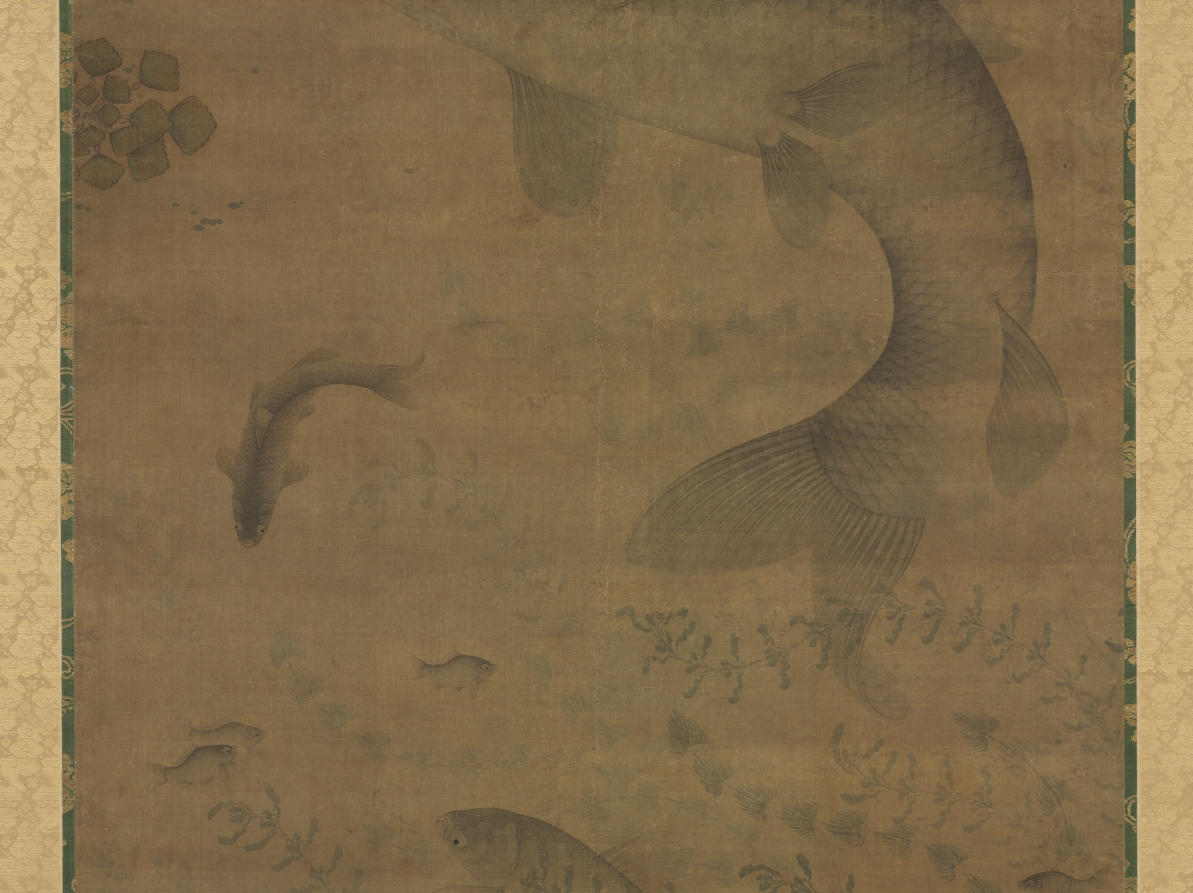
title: Leaping Carp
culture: China, Ming dynasty (1368–1644)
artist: Liu Jie (Chinese, c. 1447–1520s)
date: 1368–1644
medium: hanging scroll, ink and color on silk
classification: Painting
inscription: Artist's signature and seal: Written by Liu Jie 劉節寫. [seal] Chin-i-chih-hui chih chang.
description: With a fine ink line and graded wash, the life-like depiction of these swiftly moving carp is representative of the high quality of works by Liu Jie, a Ming dynasty court painter known for his fish paintings. The artist’s signature and seal are in the painting’s top left corner. The carp is an auspicious and popular subject in Chinese painting. Here, the leaping carp can be associated with “a carp jumping the dragon gate,” which according to mythology transforms into a dragon, emblematic of a scholar’s success in passing the civil service examinations. Another reading suggests that this carp is not leaping but guiding his offspring in worshipping heaven.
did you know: The clusters of geometric leaves painted with mineral pigments are likely water caltrap.